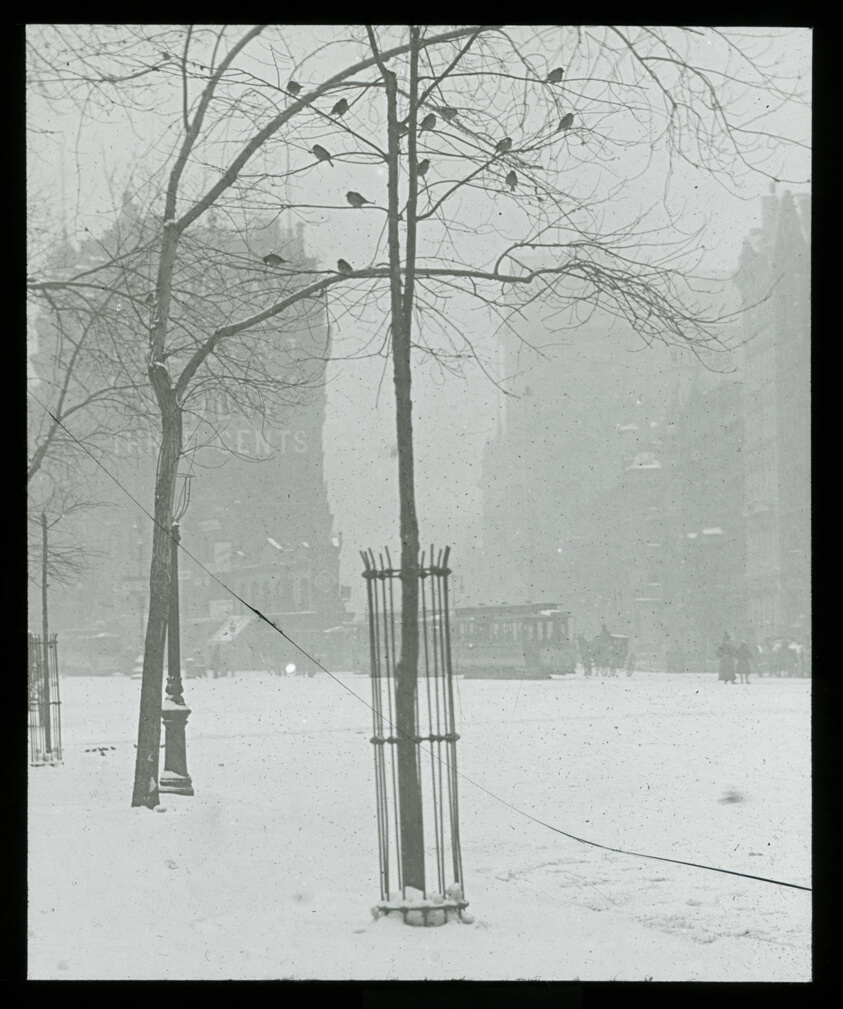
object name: Photograph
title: Tree in Snow, New York City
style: Pictorialism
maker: Alfred Stieglitz (American, 1864–1946)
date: 1900/02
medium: Lantern slide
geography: United States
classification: lantern slide (glass); negative/transparency; photography; photograph